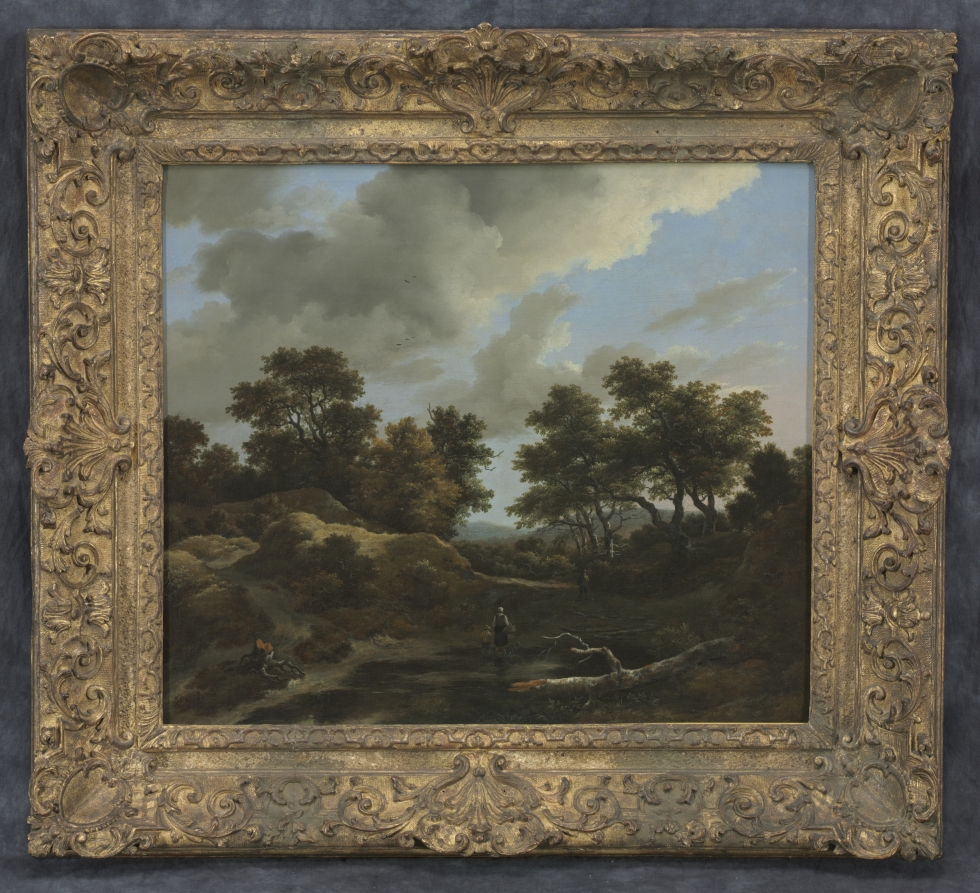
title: Wooded and Hilly Landscape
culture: Netherlands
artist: Jacob van Ruisdael (Dutch, 1628/29–1682)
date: 1660s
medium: oil on canvas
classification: Painting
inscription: Signed lower left: "JvRuisdael [JvR in monogram]"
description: Jacob van Ruisdael, one of the most eminent Dutch landscape painters, is revered for his brooding woodland compositions. With much of this painting's composition dedicated to nature alone, an underlying sense of sublimity is heightened by Ruisdael through the inclusion of several diminutive figures. A mother and child trudge through a weathered path in the foreground, their pet dog following closely at their side, while a lone traveler approaches from the foliage ahead of them. This work is an excellent representation of the artist's later period, speaking to both his preoccupation with meticulous detail and the transitory relationship between humans and nature.